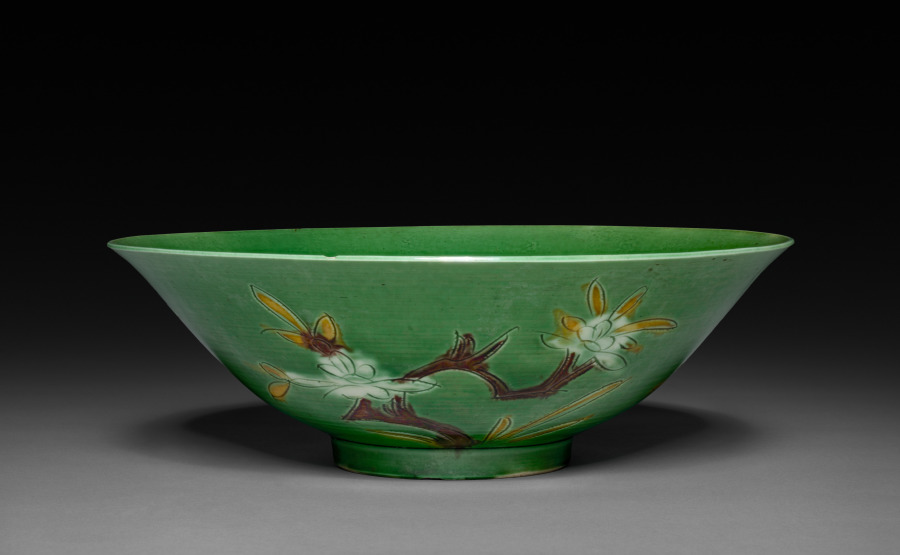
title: Bowl with Sprays of Flowers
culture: China, Jiangxi province, Jingdezhen kilns, Qing dynasty (1644-1911), Kangxi reign (1662-1722)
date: 1662–1722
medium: porcelain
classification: Ceramic